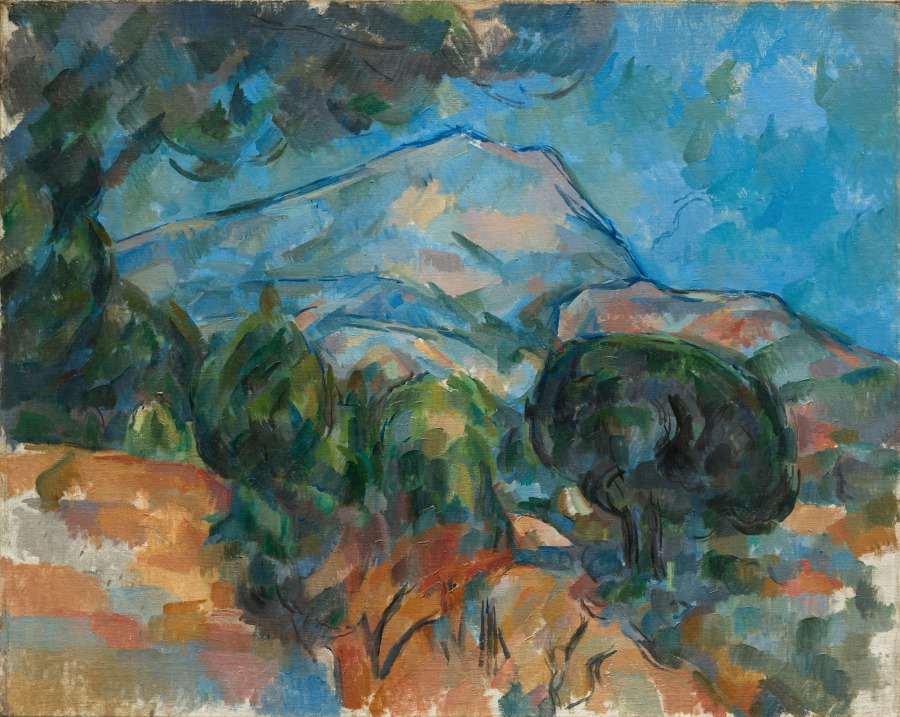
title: Mount Sainte-Victoire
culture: France, late 19th-early 20th Century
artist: Paul Cezanne (French, 1839–1906)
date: c. 1904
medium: oil on fabric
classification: Painting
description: During the last 20 years of his life, Cezanne repeatedly painted Mount Sainte-Victoire near his home in Aix-en-Provence in southern France. Cezanne painted this view from life at one of his favorite sites, a small road that led from Aix eastward toward Mount Sainte-Victoire. He set up his easel at the edge of the road where he could see two umbrella pines and the mountain towering over the scene. A branch of one of the pines extends from the left of the canvas across the sky, echoing the slope of the mountain, linking the near and the far.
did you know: Cezanne created 36 paintings and 45 watercolors of Mount Sainte-Victoire. He was preoccupied with this subject and painted this mountain repeatedly until his death.